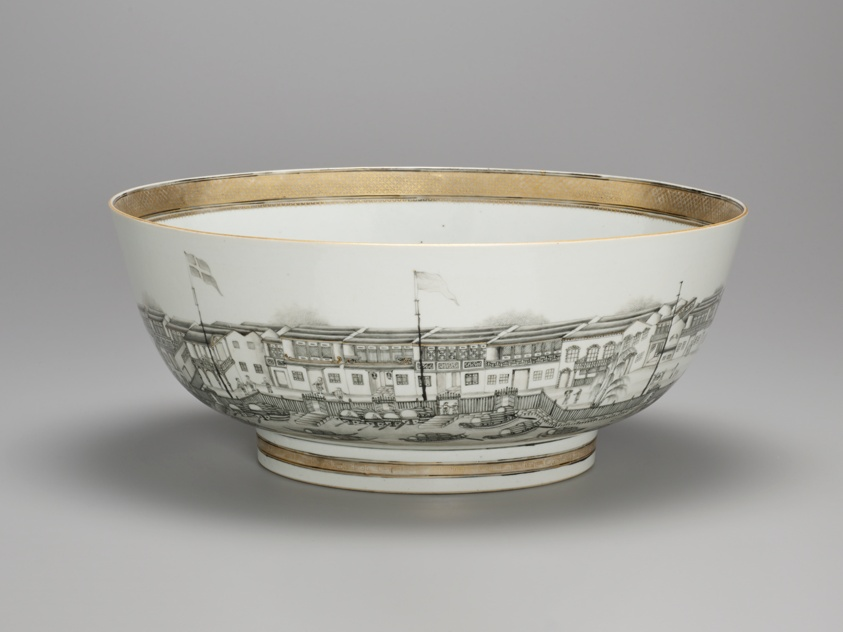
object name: Ceramics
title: Punch Bowl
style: chinese export, Export porcelain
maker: Artist unknown (Chinese, made for the American market); China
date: c. 1789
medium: Hard-paste porcelain, glaze, enamels in colors, gilding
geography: China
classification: punch bowl; chinese export porcelain; American market; art of the americas; ceramics; porcelain; decorative arts; pottery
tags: Canton, factory, port, cities, building, drinking